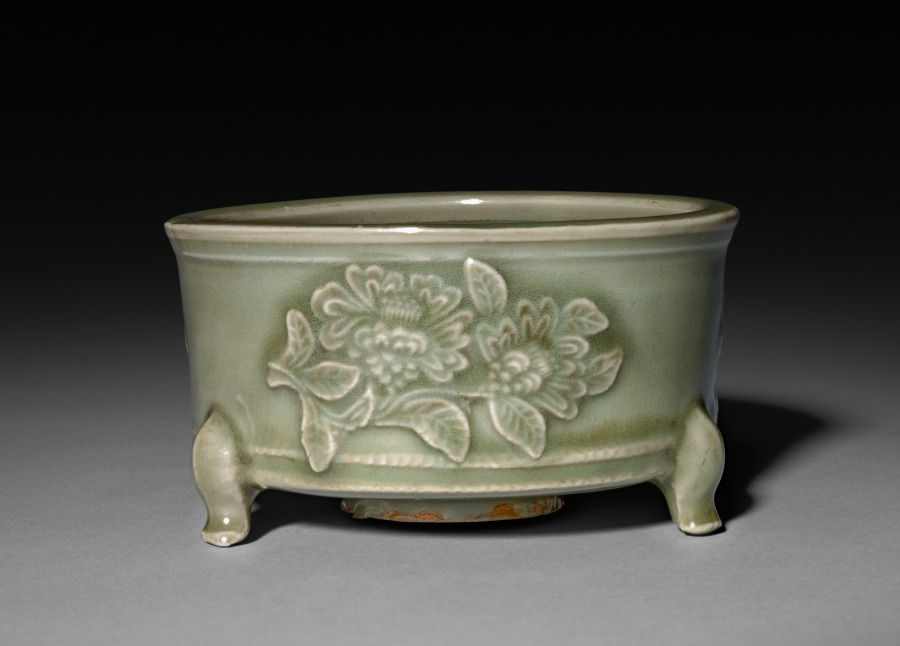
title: Incense Burner in Form of Archaic Lian with Peonies in Relief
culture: China, Zhejiang province, Yuan dynasty (1271-1368)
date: 1300s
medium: Glazed porcelain with molded decoration, Longquan ware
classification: Ceramic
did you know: In East Asian art, peonies traditionally symbolize prosperity and wealth.